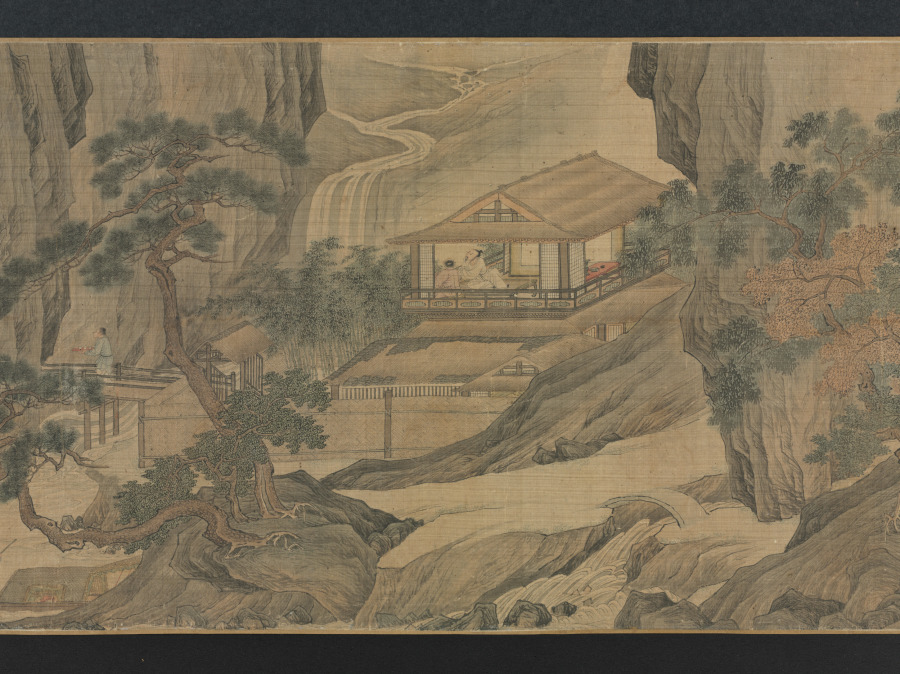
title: Scholar-Hermits in the Autumn Mountains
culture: China, Ming dynasty (1368–1644)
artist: Tang Yin (Chinese, 1470–1523)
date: 1500–1510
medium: handscroll, ink and light color on silk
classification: Painting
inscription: Artist's signature and 2 seals at end of scroll: Tang Yin [seals] T'ang Po-hu; T'ang Tzu'wei t'u-shu.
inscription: Title on frontispiece by Li Cho-kung (dates unknown).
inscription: 1 colophon and 11 additional seals: 1 colophon dated 1915 of Wu Tso-hsi (19th-20th c.); 2 seals of Gao Qifeng 高奇峰 (1889–1933); 5 seals of C. C. Wang 王季遷 (1907–2003); 4 seals unidentified.